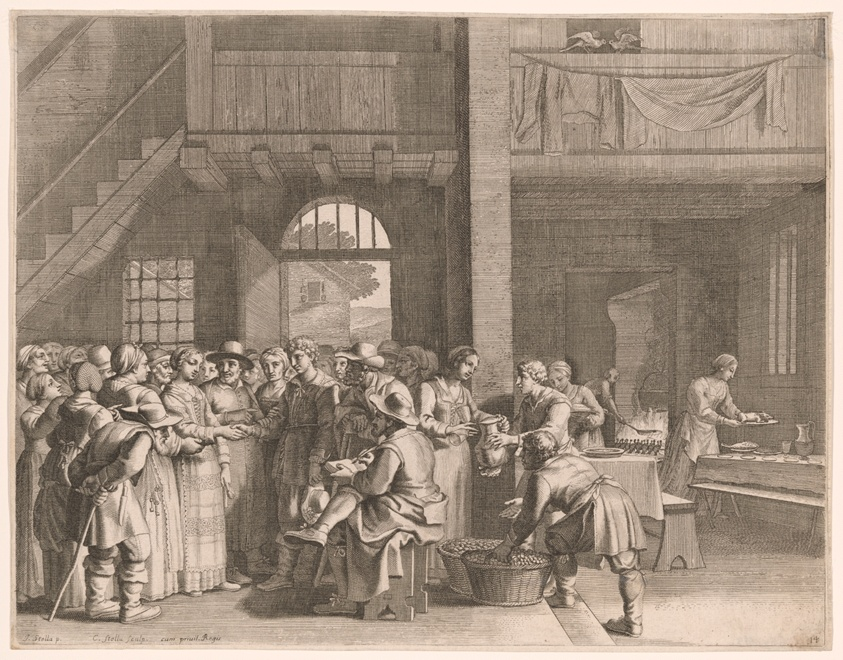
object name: Print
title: The Engagement, Plate 14 from Pastorales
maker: Claudine Bouzonnet-Stella (French, 1636–1697); after Jacques Stella (French, 1596-1657)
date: 1667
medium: Etching in black on cream laid paper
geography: France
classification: prints and drawing; paper; etching; print